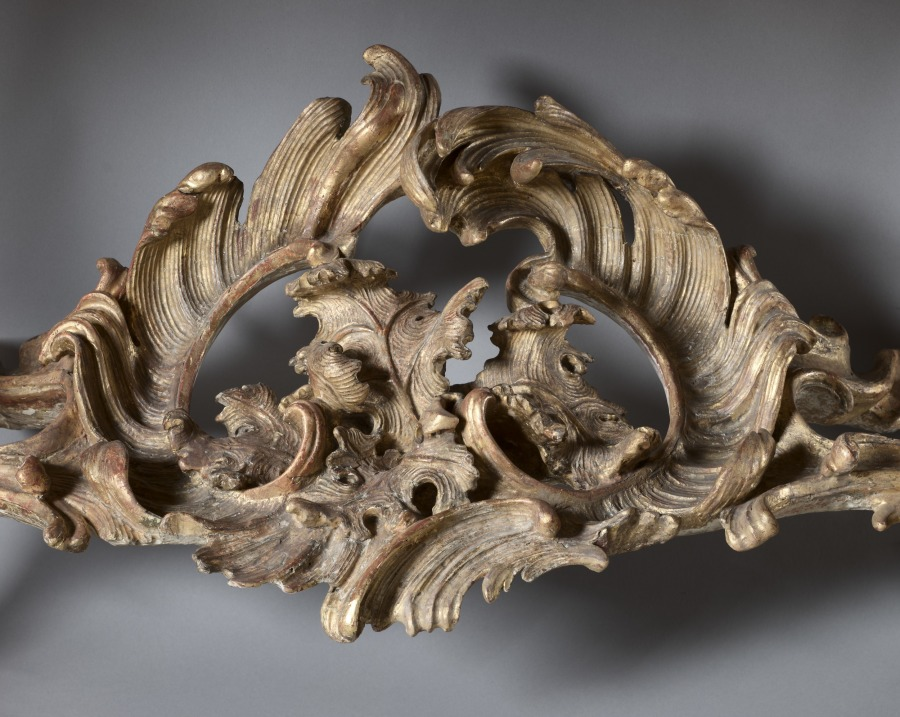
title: Console Table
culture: France, mid-18th Century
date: c. 1730– 1740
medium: gilt wood, marble top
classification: Furniture and woodwork